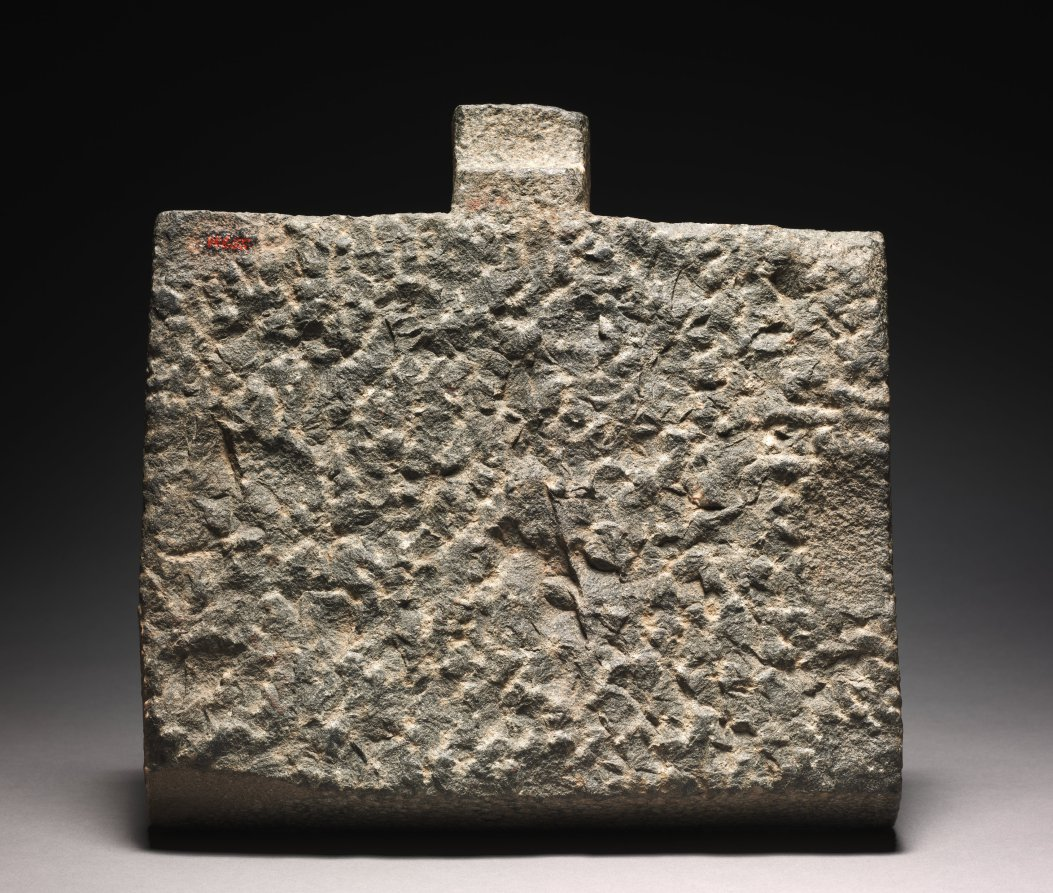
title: Offering Table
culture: Egypt, Greco-Roman period (332 BCE–395 CE), Ptolemaic dynasty (305–30 BCE)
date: 305–30 BCE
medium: granodiorite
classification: Sculpture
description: Offering tables were used in ancient Egyptian funerary rituals to create a connection between the realms of the living and the dead. Often located near or inside tombs, the table was placed flat in front of ka statues, figures designed to contain the life force of the dead, with the carved surface facing up. Water would be poured over the table, sustaining the dead with vitality. The carved relief displays images of libation jars, beer jars, fruit, bread, cucumbers, a trussed fowl, and a lotus flower. These foods were associated with the diet of the gods, emphasizing the deceased’s desire to become divine in the afterlife.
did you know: On offering tables made in earlier time periods, the channel for water usually connects to the main carved surface.